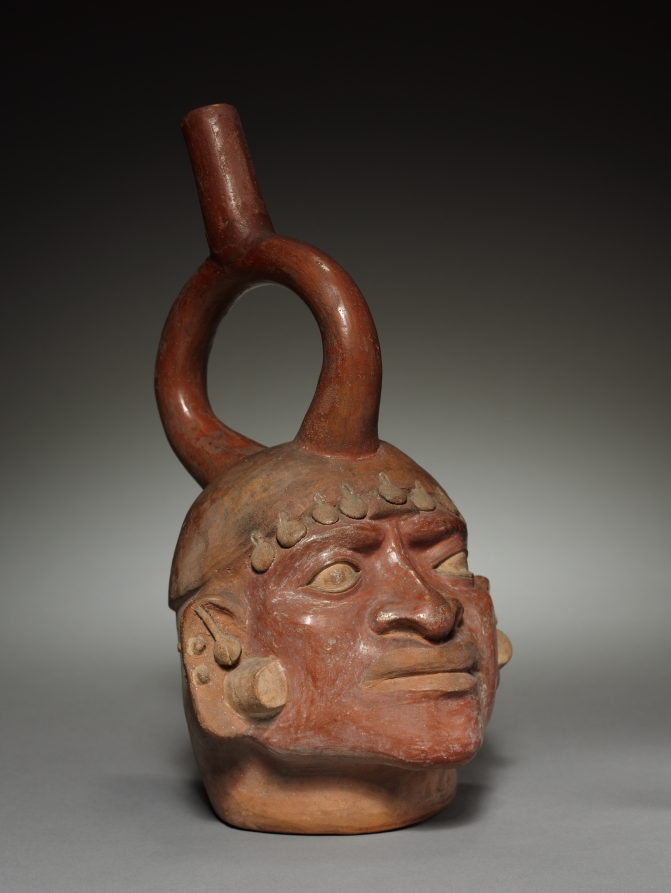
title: Bottle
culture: Peru, Mochica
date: before 1930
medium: pottery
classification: Ceramic